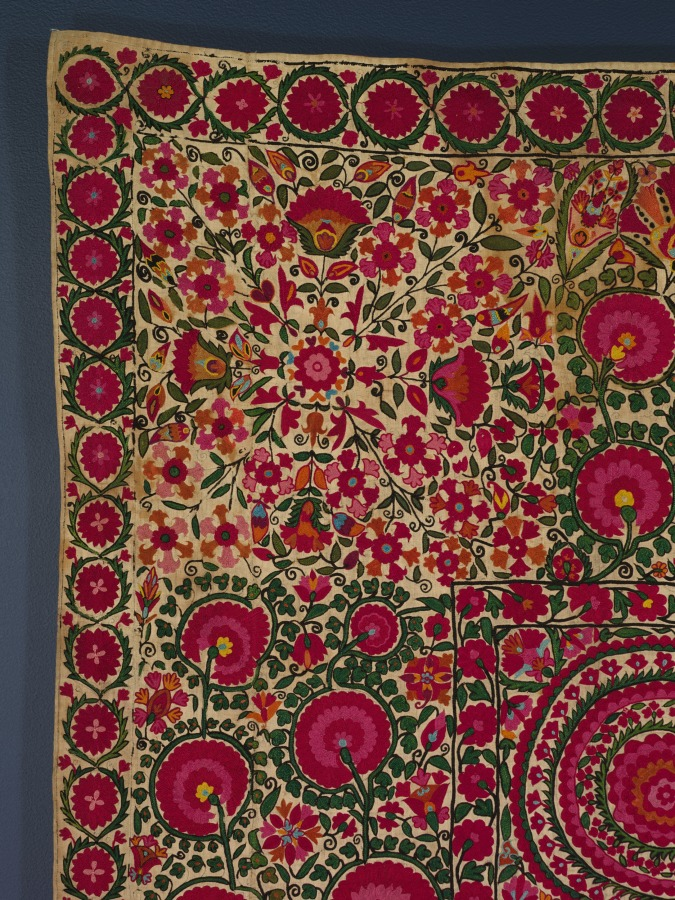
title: Curtain or bedcover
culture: Tajikistan, Ura Tube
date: early 1800s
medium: plain weave: cotton; embroidery: silk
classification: Embroidery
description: Known as suzani, embroideries with elaborate floral decoration from Central Asia were a significant part of a bride’s dowry and were ceremoniously displayed on special occasions. Women embroidered suzani, mothers passing their skills on to their daughters. Floral and foliate motifs generally dominate, emboldened with several shades of red and multiple borders, perhaps conveying cosmological, medicinal, or fertility associations. However, few display a more bountiful blossoming garden than seen here. Flora radiates from the central fanlike bouquet, a design echoed in the corners of the field and in the wide border, characteristic of work from Bukhara, Uzbekistan. Patterns were drawn on several loosely joined cotton cloths and then embroidered in chain stitch.